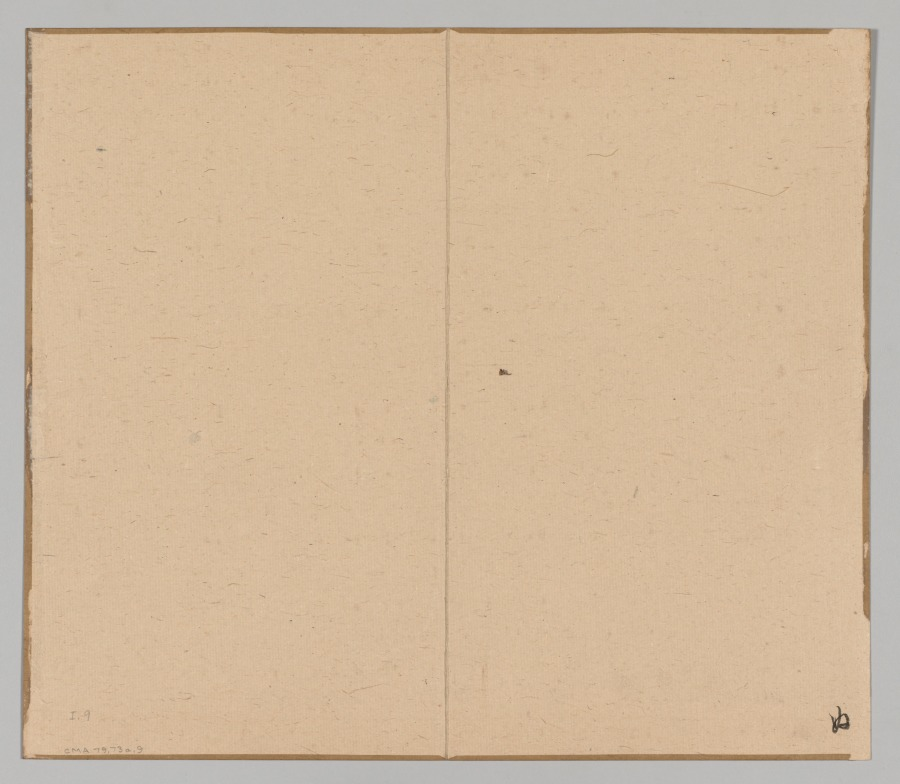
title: Reverberations of Taiga, Volume 1 (leaf 9)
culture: Japan, Edo period (1615–1868)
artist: Aoki Shukuya (Japanese, d. 1802)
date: mid- to late 1700s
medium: double-leaf from a pair of albums; ink and light color on paper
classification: Portfolio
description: Traditionally, young painters in Japan began their studies with an established master-painter. The master's compositions invariably became models that the apprentice copied to learn various ink and brush techniques. Shukuya was a pupil of the famous Kyoto artist Ikeno Taiga, whose style is reflected in these sketches of rocks, trees, and mountains.